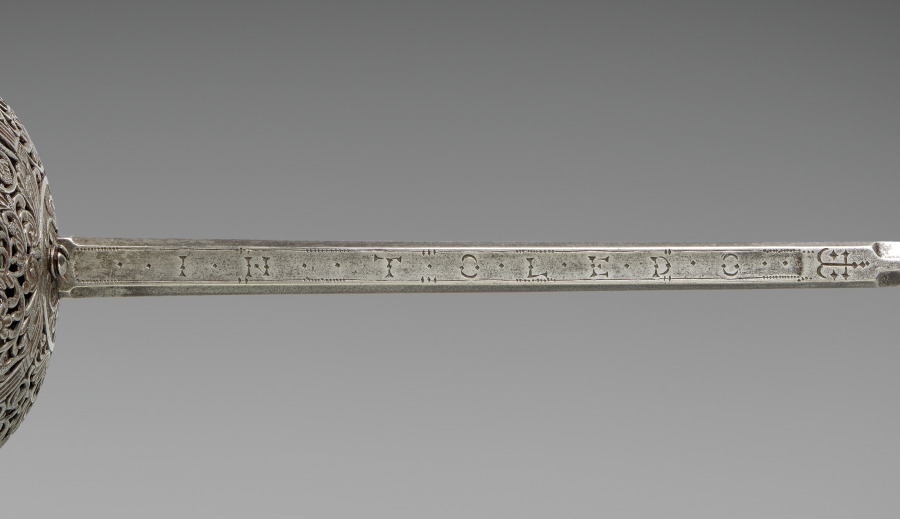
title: Cup-Hilted Rapier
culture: Spain, Toledo, 17th century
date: c. 1650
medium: Pierced and chiseled steel;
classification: Arms and Armor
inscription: PEDRO DEL MONTE/ IN TOLEDO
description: For parrying, rapiers were often made with accompanying daggers as a matched set. The aristocracy's taste for rich and intricate styles of decoration led to extravagant gilding, chiseling, piercing, enameling, and silvering. The more costly or unusual these weapons appeared, the more they were desired by the clientele who commissioned them, not only for dueling but also as the ultimate accessory.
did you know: The guard is richly decorated with chiseled and pierced arabesques, an ornamental design consisting of intertwined flowing lines.